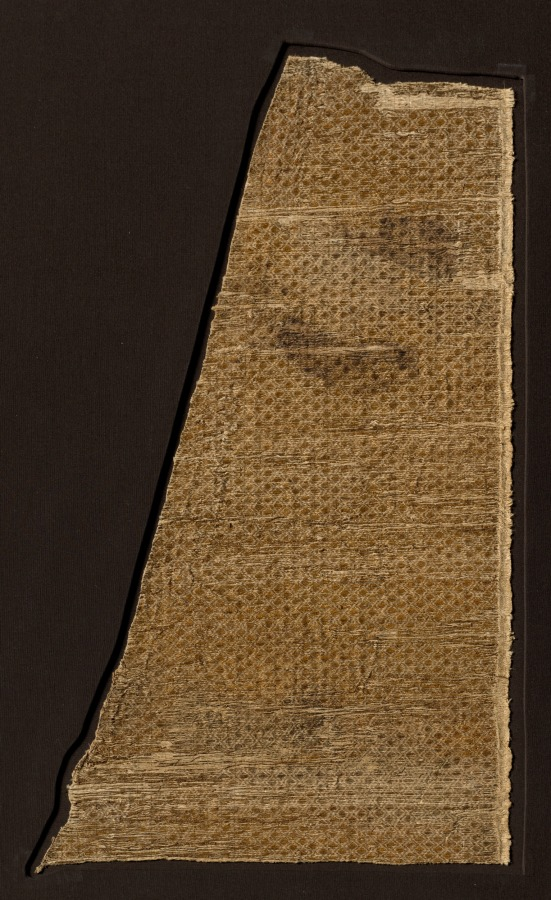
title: Textile with Diamonds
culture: Central Asia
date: 1000s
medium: silk, cotton, and silver thread: tabby with supplementary weft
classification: Textile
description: Few Central Asian luxury silks dating from the 900s–1000s have survived. Here the cotton wefts, together with thin, widely spaced silk warps, identify this example as Central Asian. Its date has been determined by comparing it with two related textiles that are securely dated. At this time Chinese silks with small-scale diamond patterns were usually reserved for undergarments or linings. The use of silver thread for the tiny diamonds in this example, however, may indicate that in Central Asia the design had greater importance. Over time, this textile made its way to Europe, where it was preserved in a church treasury. Because such textiles were expensive, rare, and sometimes associated with saints, they were highly valued regardless of their condition.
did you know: A complete selvage is preserved along one side of the fragment.